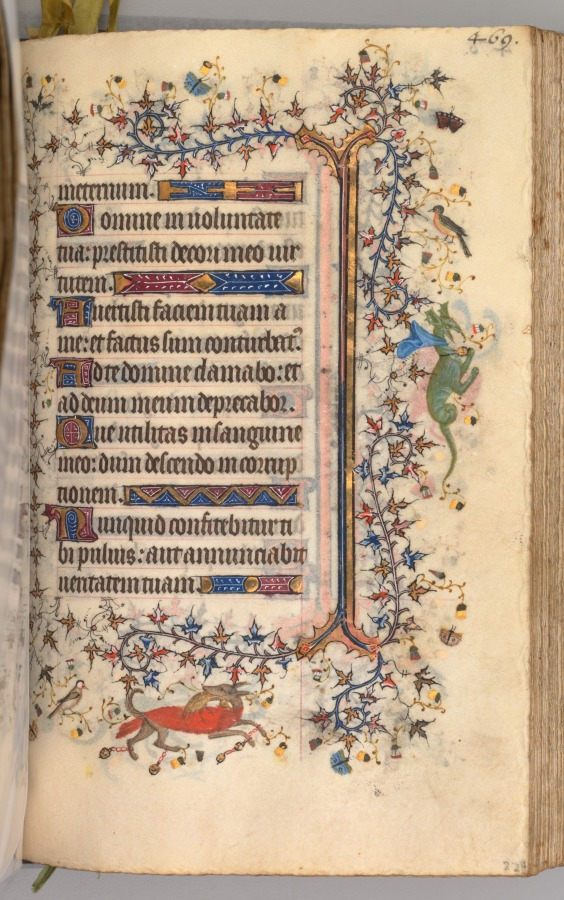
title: Hours of Charles the Noble, King of Navarre (1361-1425): fol. 229r, Text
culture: France, Paris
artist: Master of the Brussels Initials and Associates (French)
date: c. 1405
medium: ink, tempera, and gold on vellum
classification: Bound Volume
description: This precious volume was obviously highly prized by its owner, the French-born King of Navarre, who had his coat of arms painted on no less than twenty folios. Rather than directly commissioning this manuscript from a specific workshop, it seems that Charles the Noble acquired his book of hours -- perhaps ready-made for the luxury market -- while on a trip to Paris in 1404-05. A collaborative effort, six painting styles are evidenced within the pages of this codex, those of two Italians, two Frenchmen, and two Netherlanders. The painter who was responsible for the planning and decoration of the book, and who produced seventeen of the large miniatures, was a Bolognese artist known as the Master of the Brussels Initials. His principal assistant, responsible for most of the borders, was a Florentine who signed his name "Zecho" da Firenze on folio 208 verso.